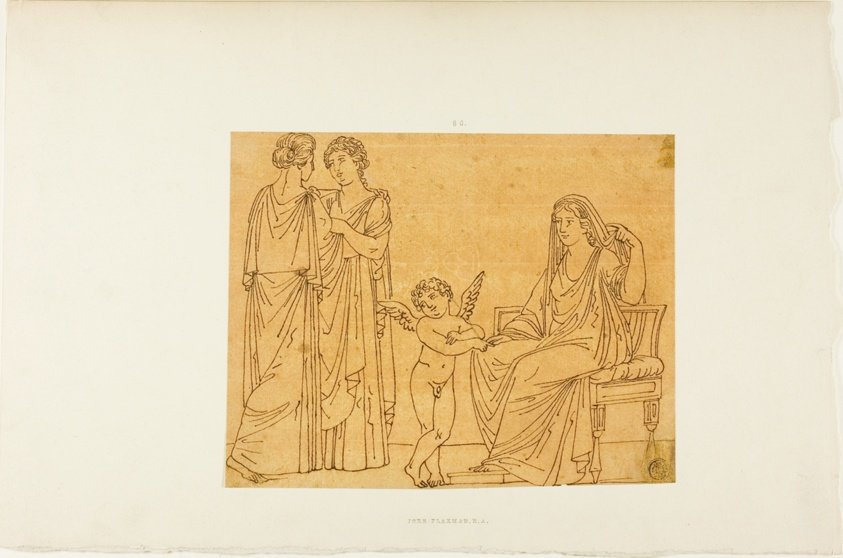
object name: Drawing and Watercolor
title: Cupid and Three Women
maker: John Flaxman, II; English, 1755-1826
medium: Pen and brown ink on ochre laid paper, laid down on ivory wove paper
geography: England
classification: pen and ink drawings; drawings (visual works); prints and drawing